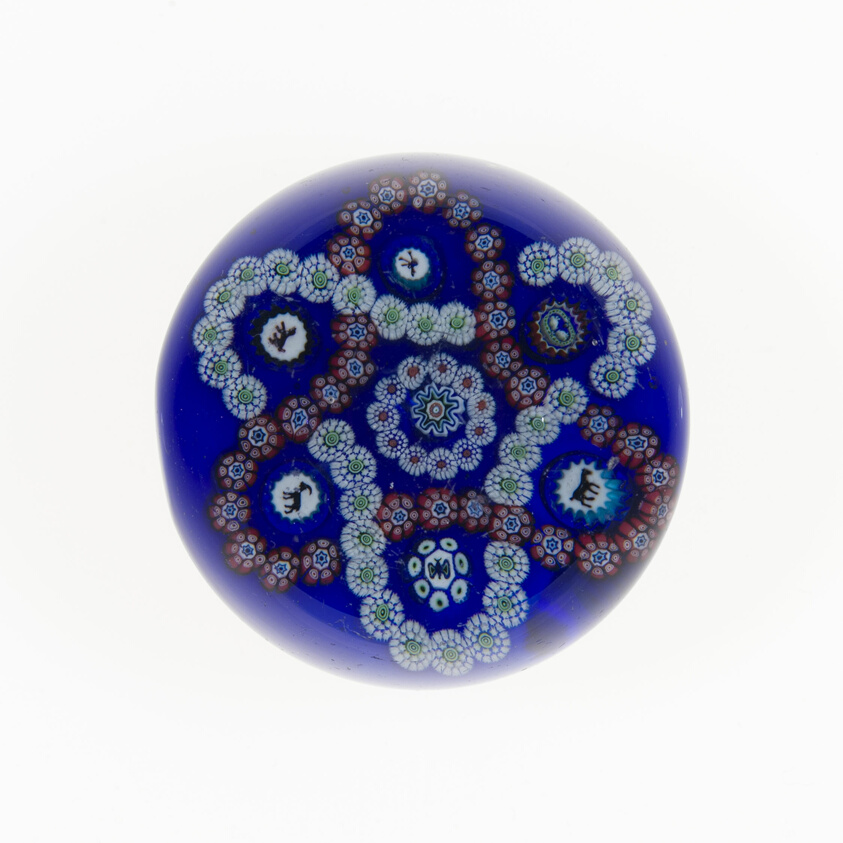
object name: Glass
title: Paperweight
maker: Baccarat Glassworks (Cristalleries de Baccarat); Lorraine, France, founded 1764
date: c. 1845/60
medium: Glass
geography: France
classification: paperweight; glass